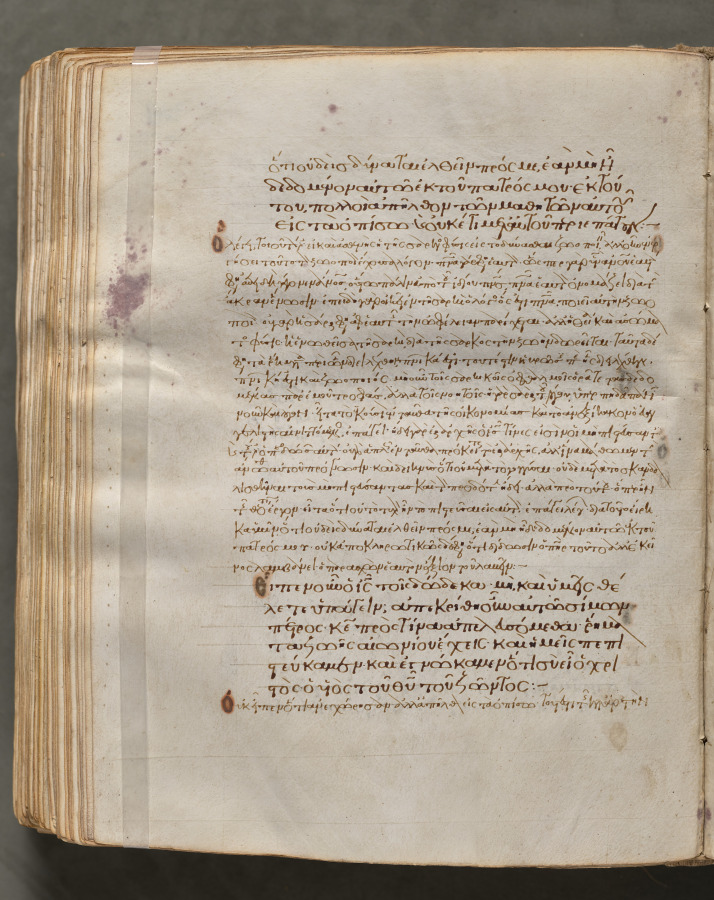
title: Text, folio 355 (verso), from a Gospel Book with Commentaries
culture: Byzantium, Constantinople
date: c. 1000–1100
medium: ink, tempera, and gold on vellum; leather binding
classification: Bound Volume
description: Each of the four gospels in this book opens on a page with brilliantly illuminated borders depicting the author of the text as well as birds—principally peacocks, symbols of the immortality of the soul—and fountains, representing the fountain of life and the salvation of the soul. This volume consists of 428 leaves with texts in Greek. Its level of sophistication suggests that it was probably written and decorated in a monastery in Constantinople.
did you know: Gospel books were carried in procession through Byzantine churches.